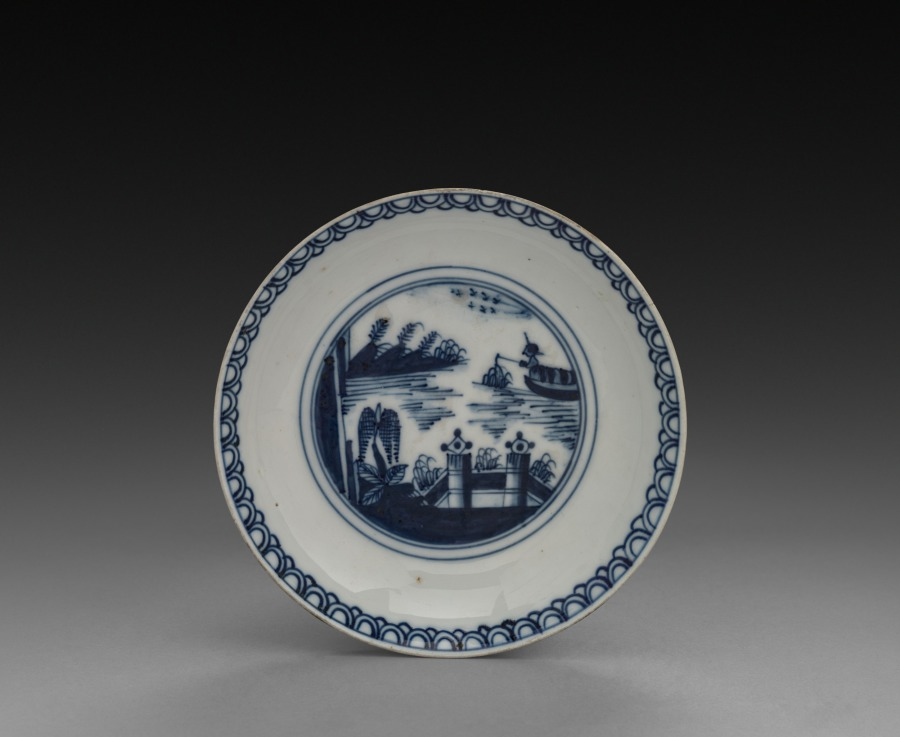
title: Saucer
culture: Germany, Meissen, 18th century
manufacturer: Meissen Porcelain Factory (German, est. c. 1710)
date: 1756–80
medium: porcelain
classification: Ceramic